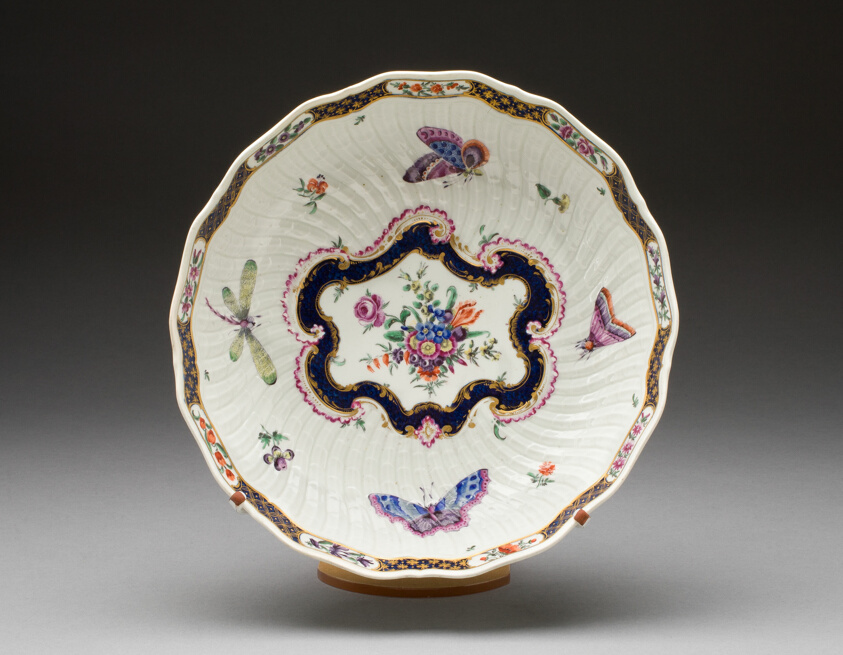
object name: Ceramics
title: Dish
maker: Worcester Porcelain Factory (Warmstry House Period, 1751–1783); Worcester, England, founded 1751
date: c. 1770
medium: Soft-paste porcelain, underglaze blue, polychrome enamels and gilding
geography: Worcester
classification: dish (vessel); ceramics; porcelain; european decorative arts